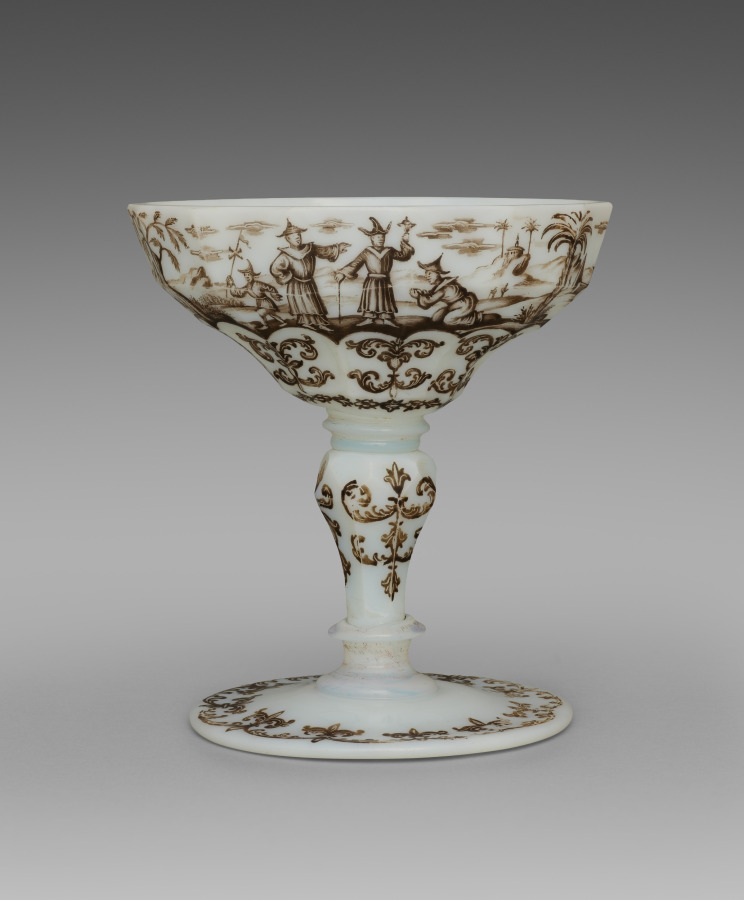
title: Cup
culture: Bohemia, 18th century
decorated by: Ignaz Preissler (Bohemian, 1676–1741)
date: c. 1735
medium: Opal glass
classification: Glass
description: This cup may have functioned as a vessel for an alcoholic beverage or as a container for food such as candies or pastries. Ignaz Preissler’s specialty was a technique known as Schwarzlot (“black lead” in German), in which a design was painted with black enamel and then fine details were scratched out with a needle. Preissler’s clients were primarily aristocrats who commissioned vessels as gifts or commemorative items and for whom the chinoiseriedecoration (imaginary European interpretations of Asian cultures), seen here, was fashionable.